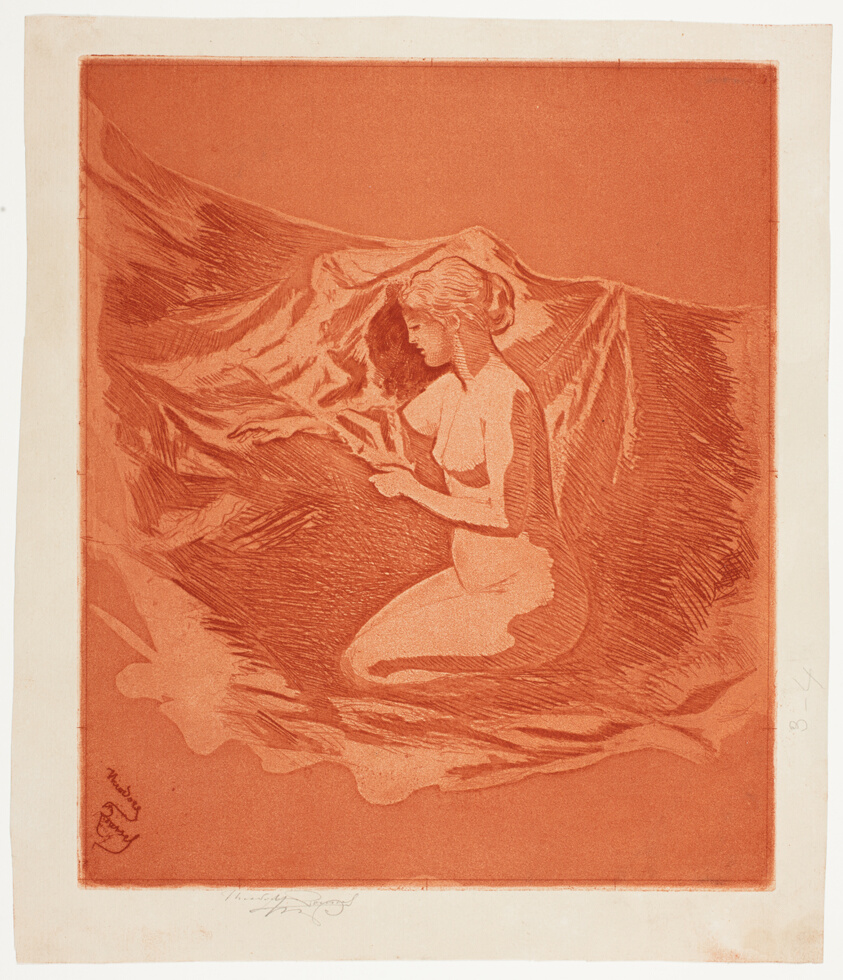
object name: Print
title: Embers Glow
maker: Theodore Roussel (French, worked in England, 1847-1926)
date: 1890–97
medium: Etching and aquatint in orange on cream laid paper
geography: England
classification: etching; paper; print; prints and drawing